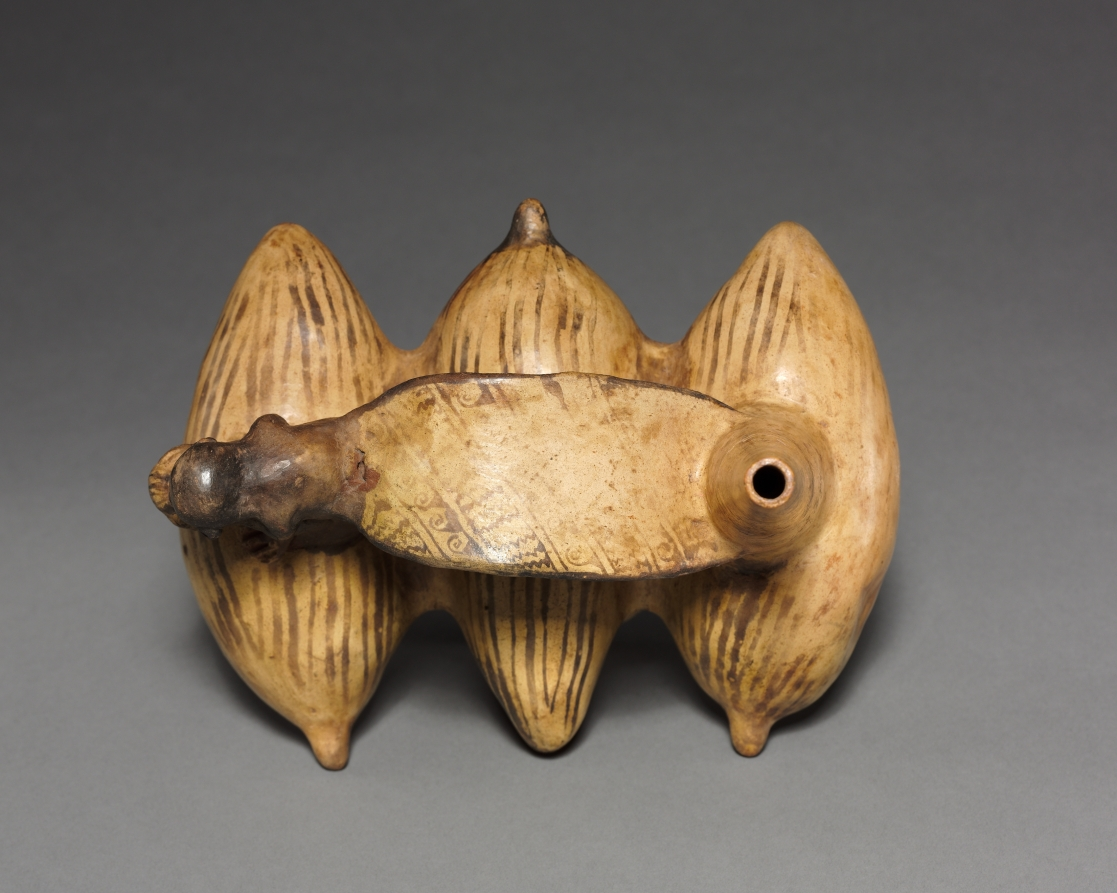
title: Stirrup Jar with Monkey and Three Fruits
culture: Peru, North Coast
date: 1000 or later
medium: red earthenware decorated with cream-colored slip and brown pigment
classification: Ceramic